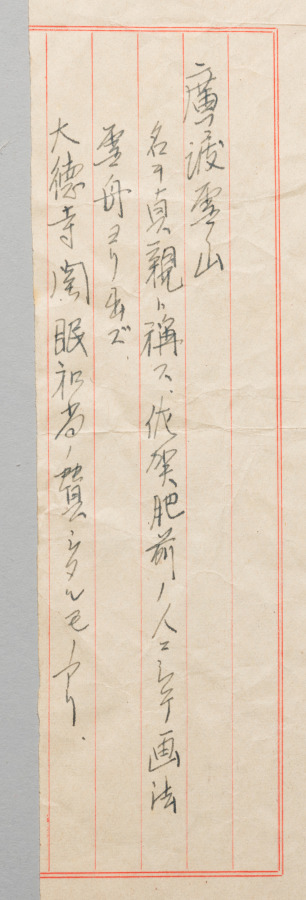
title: Mountain and River in Storm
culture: Japan, Edo period (1615–1868)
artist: Hirowatari Setsuzan (Japanese, ?-1674)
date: early to mid-1600s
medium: hanging scroll; ink on paper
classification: Painting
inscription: signed: Setsuzan hitsu